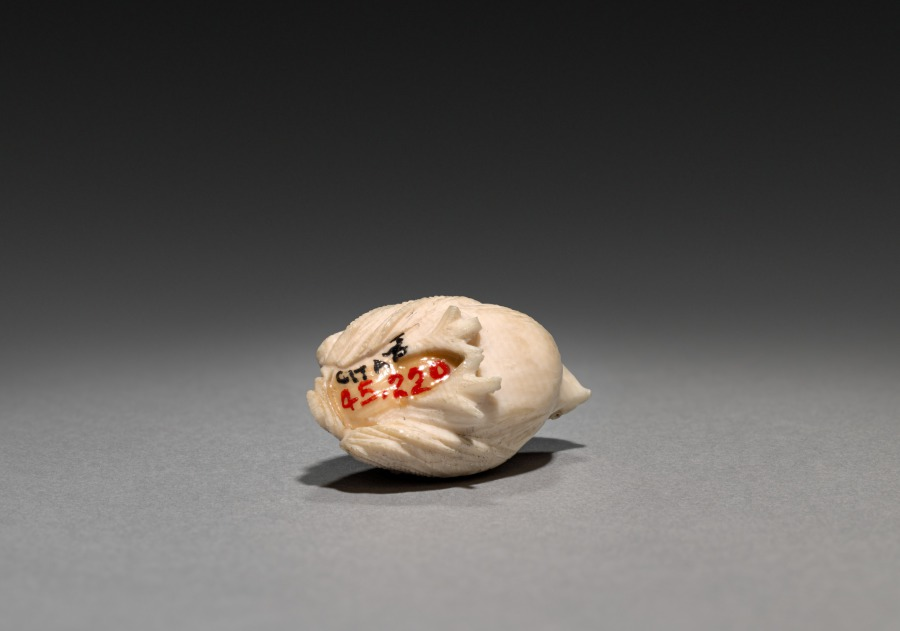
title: Quail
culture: Japan, Meiji period (1868–1912)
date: early 1900s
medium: ivory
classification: Ivory